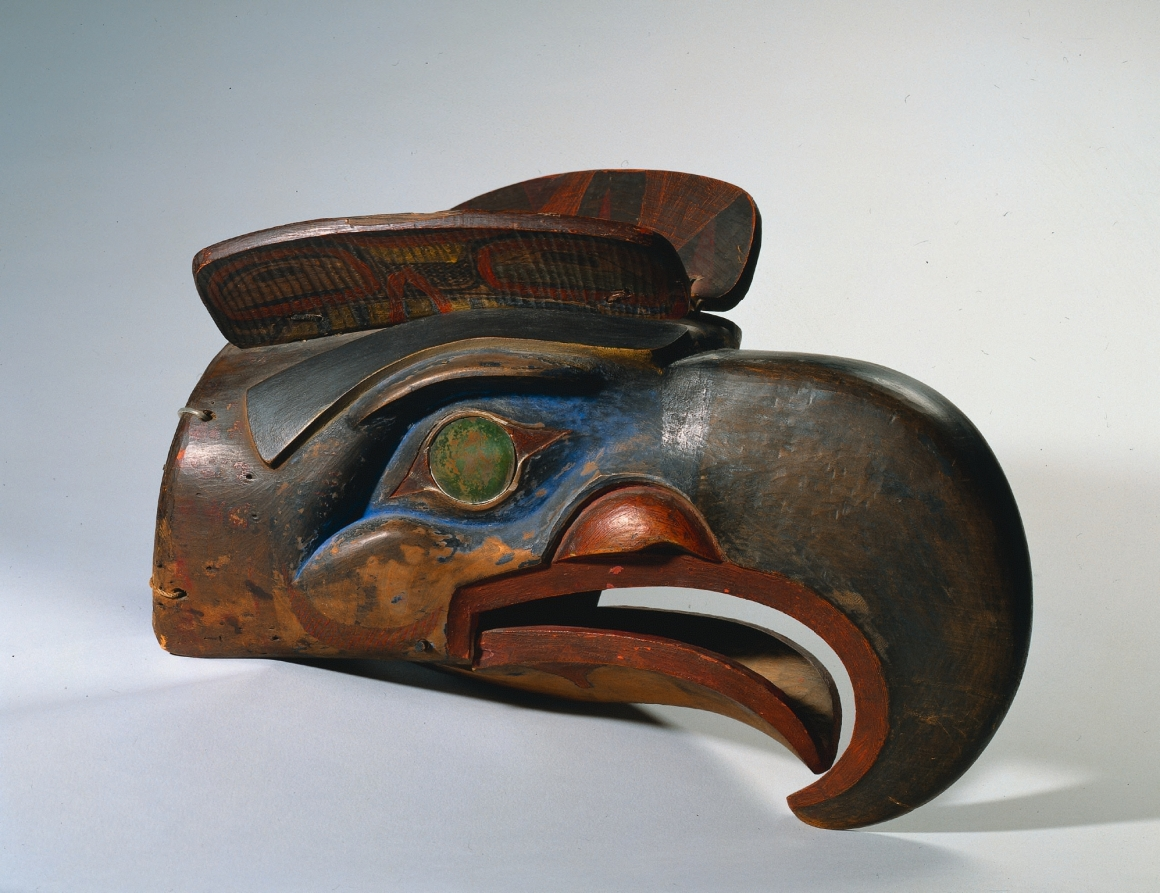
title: Mask: Eagle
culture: Native North America, Northwest Coast, British Columbia, Nuxalk (Bella Coola)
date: 1800s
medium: wood, pigment, restored eye inlays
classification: Sculpture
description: Across the Northwest Coast, native people engaged in renewal rites during the winter ceremonial season. This mask, with a beak that opens and head panels that move, may have been used during such celebrations. In 1998, Robert Joseph, a Northwest Coast chief, recalled that when he donned dance masks like this one as a youth, "all the world is somewhere else . . . I am the mask . . . the bird . . . the animal . . . the spirit. I transcend into the being of the mask."